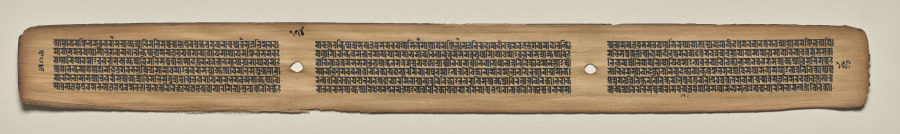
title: Text, Folio 154 (verso), from a Manuscript of the Perfection of Wisdom in Eight Thousand Lines (Ashtasahasrika Prajnaparamita-sutra)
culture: Eastern India, Bihar, Vikramashila Monastery. Painting: Nepal, Kathmandu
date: Sunday, September 14, 1119 (year 239 of the Newar Samvat in the month of Ashvina)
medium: gum tempera and ink on palm leaves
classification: Painting